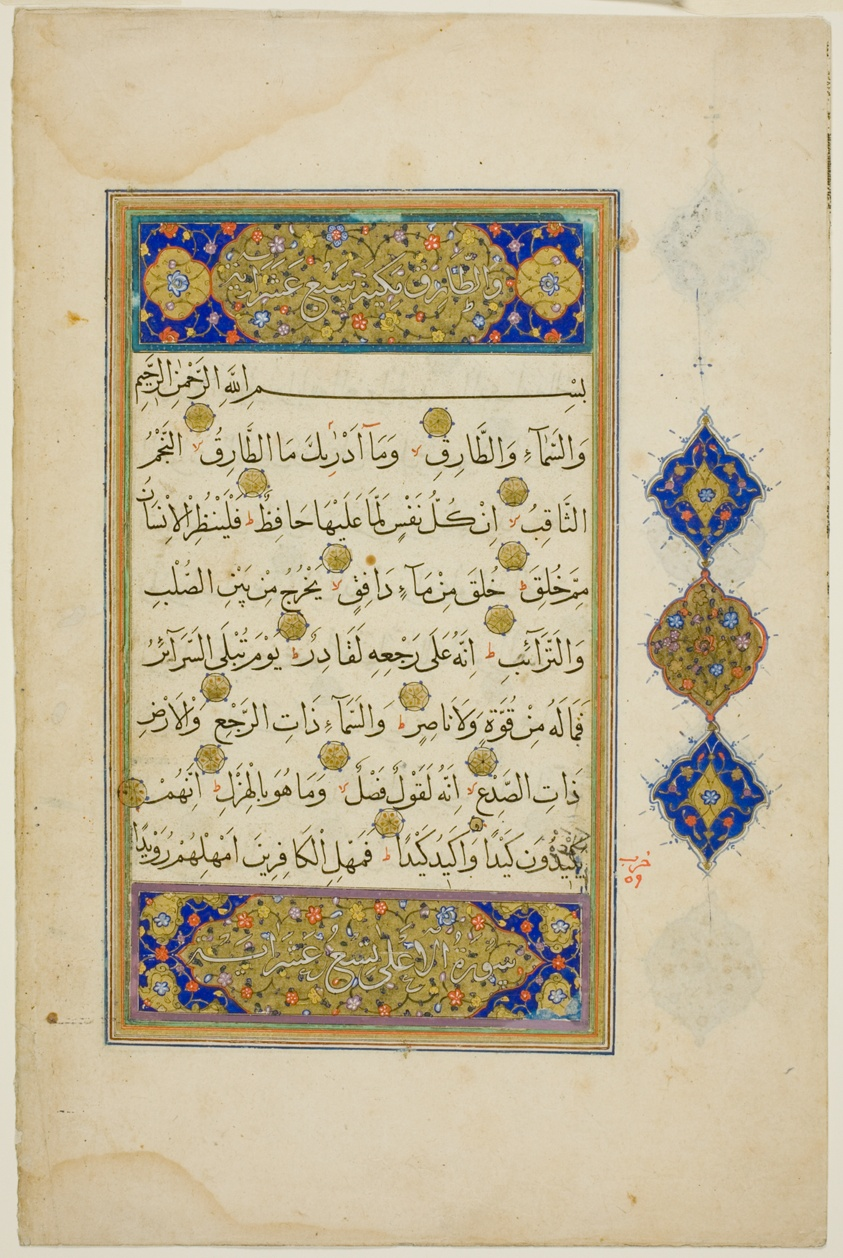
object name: Painting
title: Page from a Copy of The Qur'an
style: Islamic (culture or style)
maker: Iran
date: 16th/17th century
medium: Ink, colors, and gold on paper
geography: Iran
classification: calligraphy; manuscript; asian art; painting